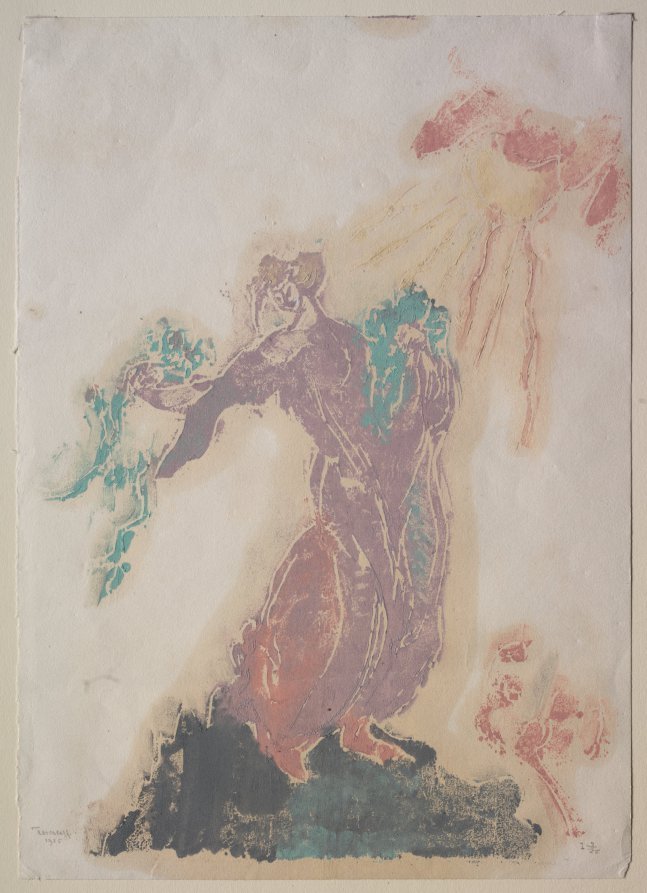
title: Flower Girl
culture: Finland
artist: Ellen Thesleff (Finnish, 1869–1954)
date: 1925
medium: color woodcut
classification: Print